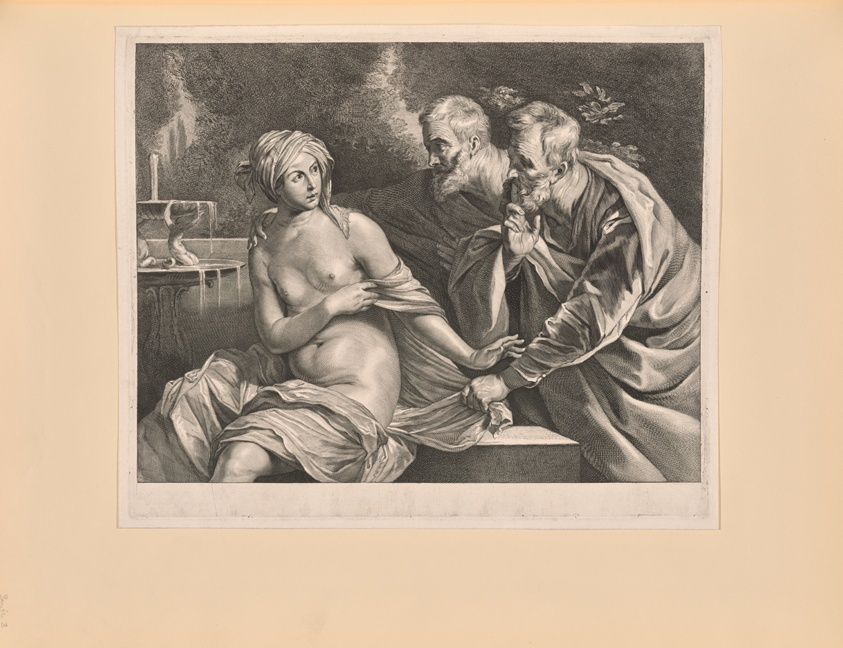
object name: Print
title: Susanna and the Elders, from Cabinet Reynst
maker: Cornelis Visscher (Dutch, c. 1629-1658); after Guido Reni (Italian, 1575-1642)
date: c. 1655-58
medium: Etching and engraving on paper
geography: Netherlands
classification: engraving; paper; print; prints and drawing